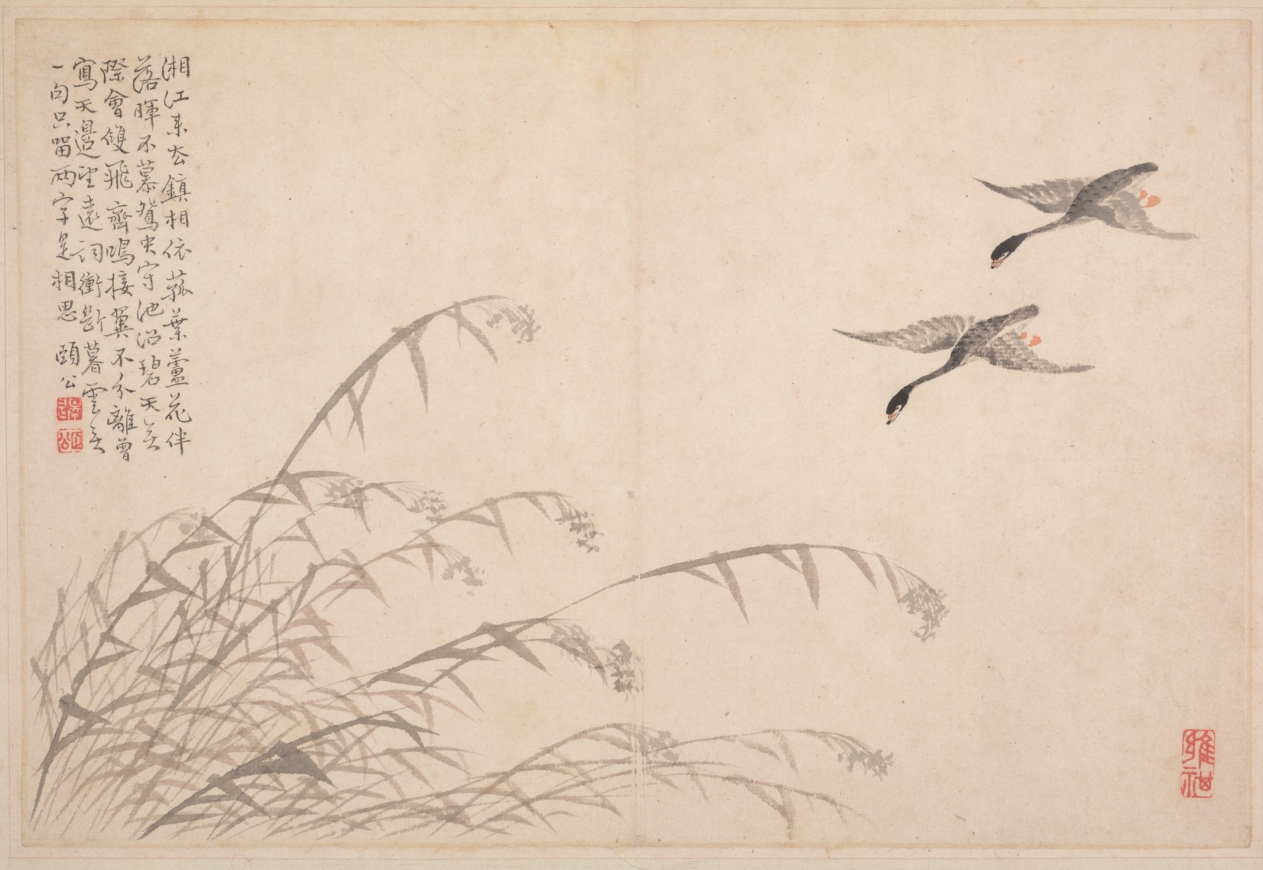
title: Album of Calligraphy and Paintings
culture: China, Qing dynasty (1644-1911)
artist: Bian Shoumin (Chinese, 1684–1752)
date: first half of the 1700s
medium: album leaf; ink and color on paper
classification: Painting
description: The artist Bian Shoumin is known for his depiction of wild geese, water, and reeds. The migrant birds in autumn and winter evoked, in the minds of the Chinese intelligentsia, a time of parting and sorrow.